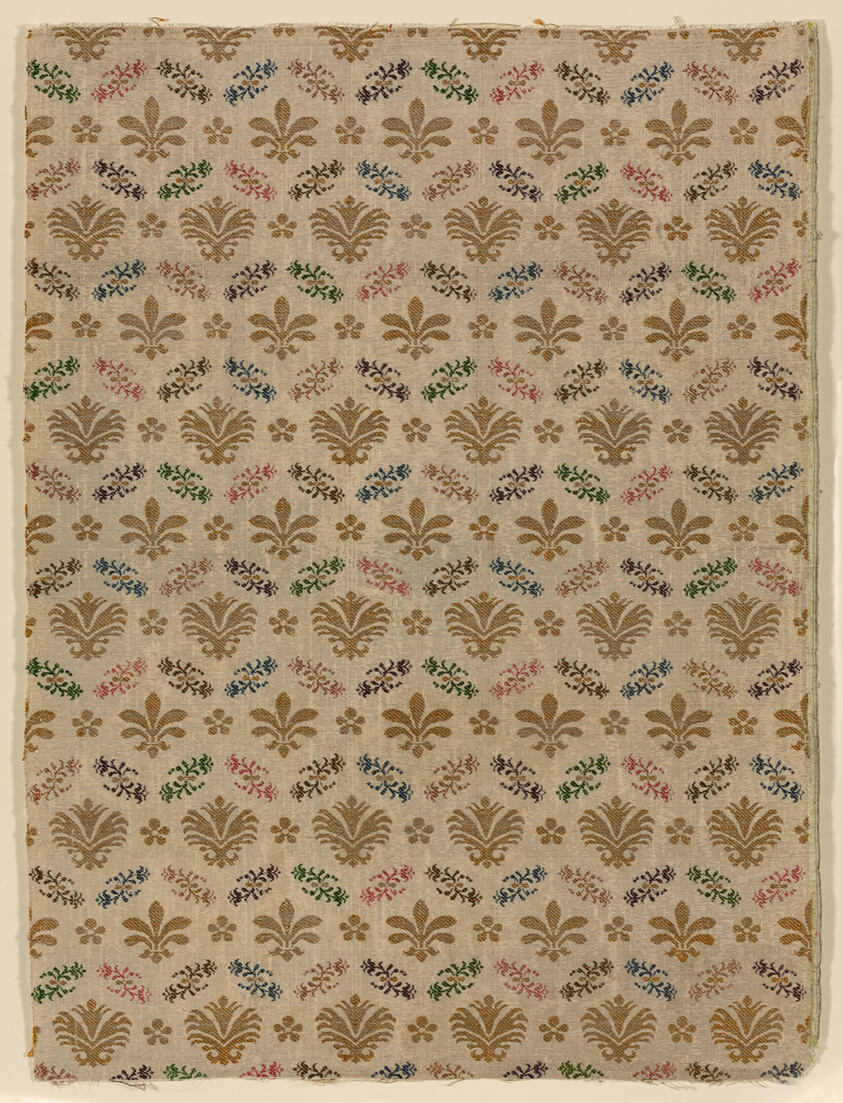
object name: Textile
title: Fragment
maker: France or Italy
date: 17th century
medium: Silk, gold and silver gilt strips wound around silk fiber core, plain weave with supplementary patterning and brocading weft tied in twill interlacing polychrome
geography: Italy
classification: textile; weaving